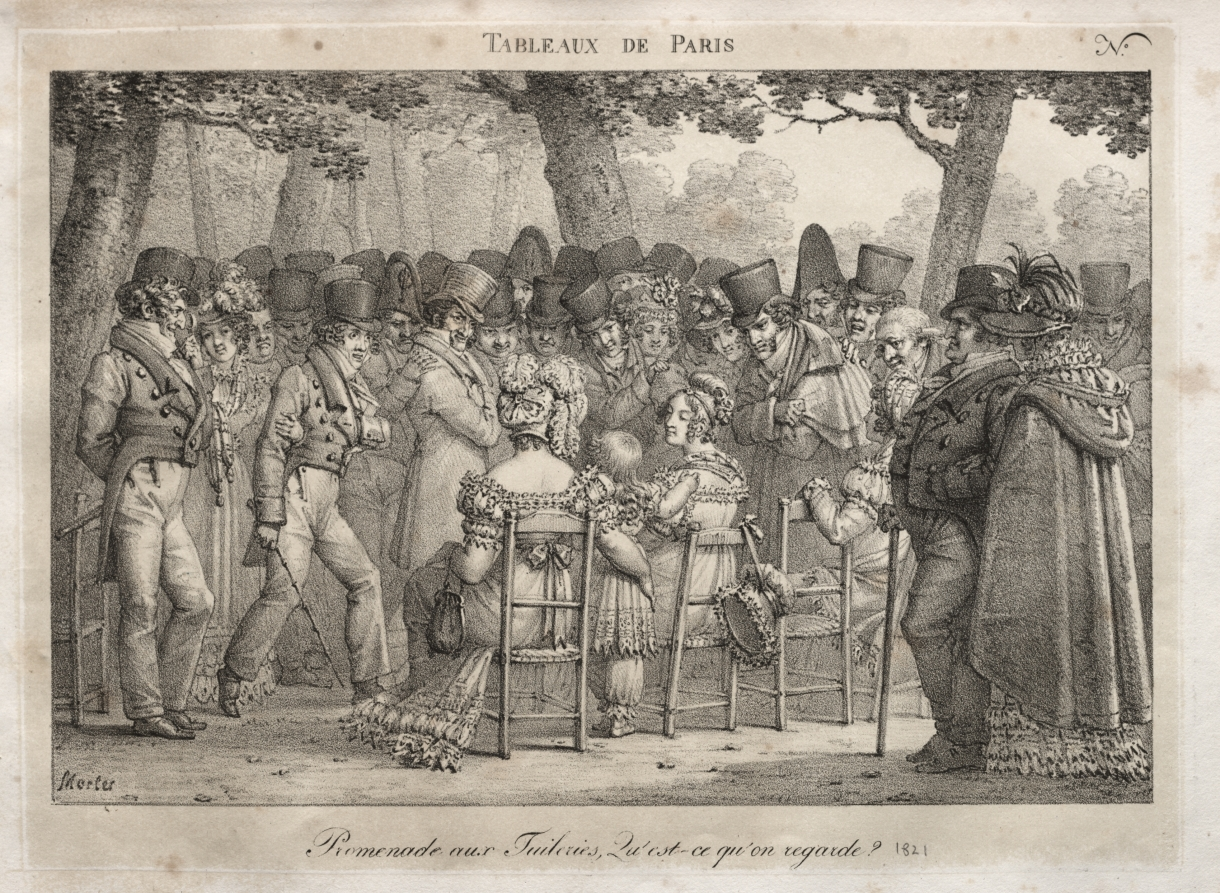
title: Promenade in the Tuileries. What are they looking at?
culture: France, 19th century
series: Scenes of Paris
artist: Jean Henri Marlet (French, 1770–1847)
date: 1820s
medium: lithograph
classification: Print